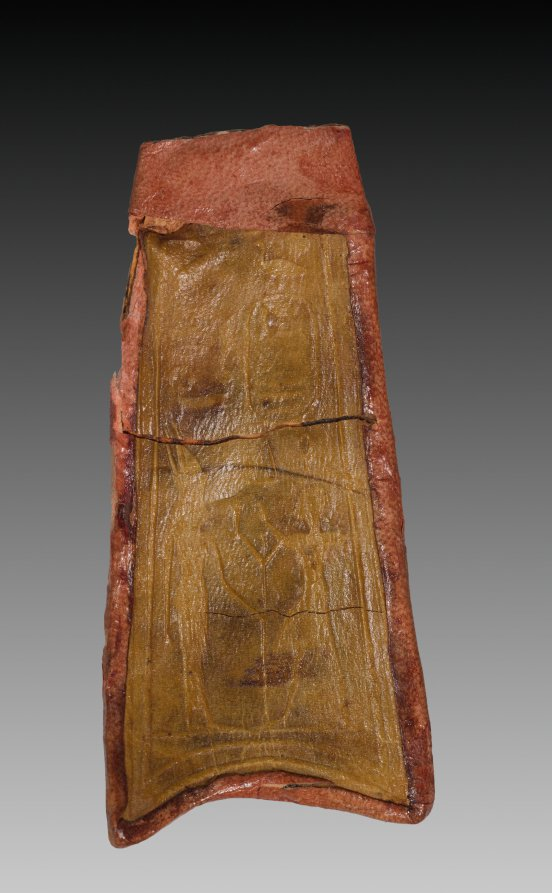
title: Tab from Mummy Band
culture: Egypt, Third Intermediate (1069–715 BCE), Dynasty 22, reign of Osorkon I (992–887 BCE)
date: 945–715 BCE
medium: stained leather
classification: Funerary Equipment